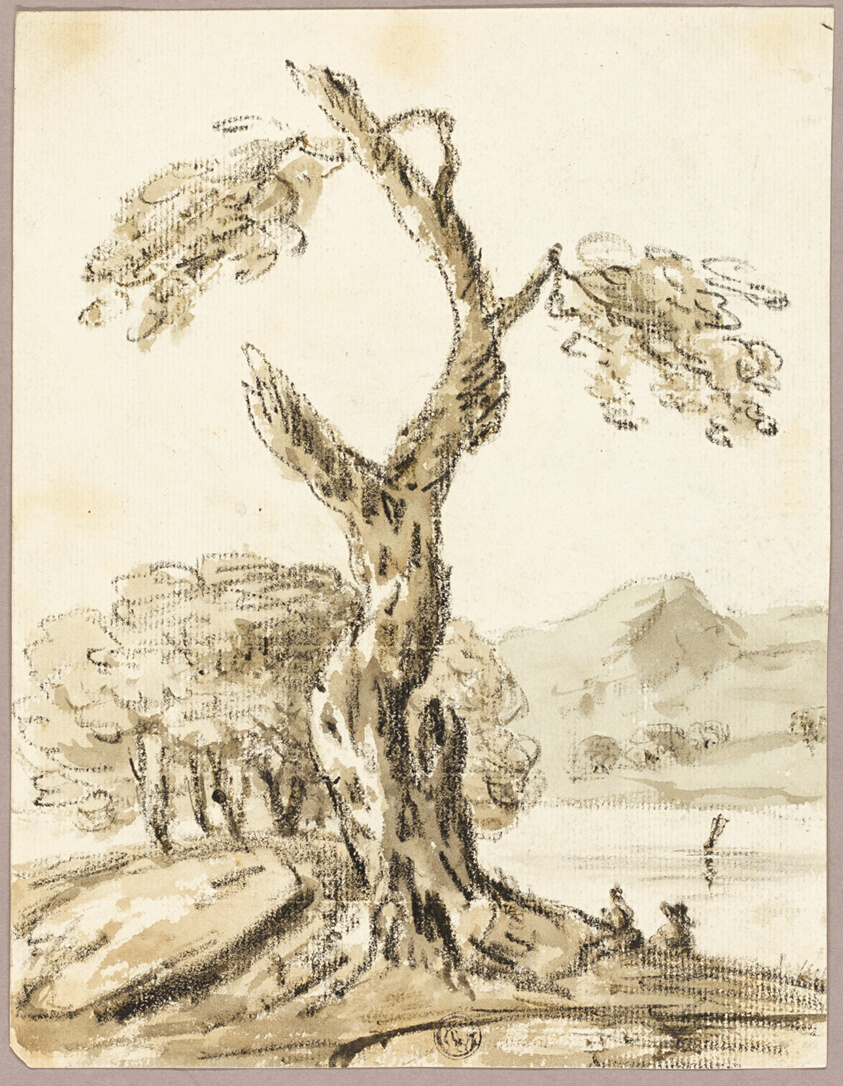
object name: Drawing and Watercolor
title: Large Tree with Lake and Mountains in Background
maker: Attributed to Thomas Barker (English, 1769-1847); or Thomas Jones Barker (English, 1815-1882)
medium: Wax crayon, with brush and brown and blue (faded) wash, on cream laid paper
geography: England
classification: drawings (visual works); ink or chalk wash; paper; crayon; prints and drawing